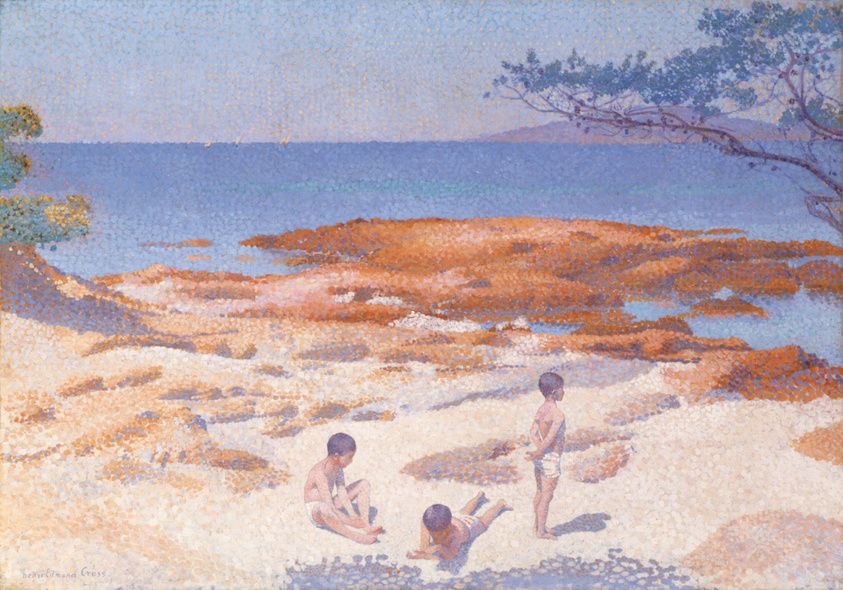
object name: Painting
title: Beach at Cabasson (Baigne-Cul)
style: Post-Impressionism, 19th century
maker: Henri Edmond Cross (French, 1856–1910)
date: 1891–92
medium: Oil on canvas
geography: France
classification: oil on canvas; paint; painting; european painting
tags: children, mediterranean, France, beach, weather/seasons, leisure, landscapes, water